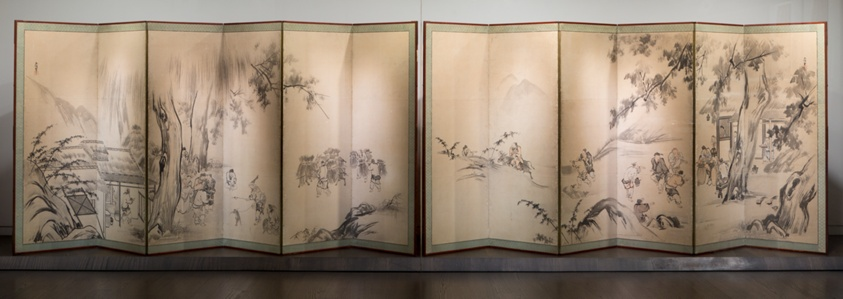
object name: Furniture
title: Monkey Trainers and Scenes of Chinese Life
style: Japanese (culture or style), edo (japanese period), asian, East Asian, Japanism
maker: Kano Yasunobu (Japanese, 1613-1685)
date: 17th century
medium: Pair of six-panel screens; ink and light colors on paper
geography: Japan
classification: screen; asian art; painting; furniture